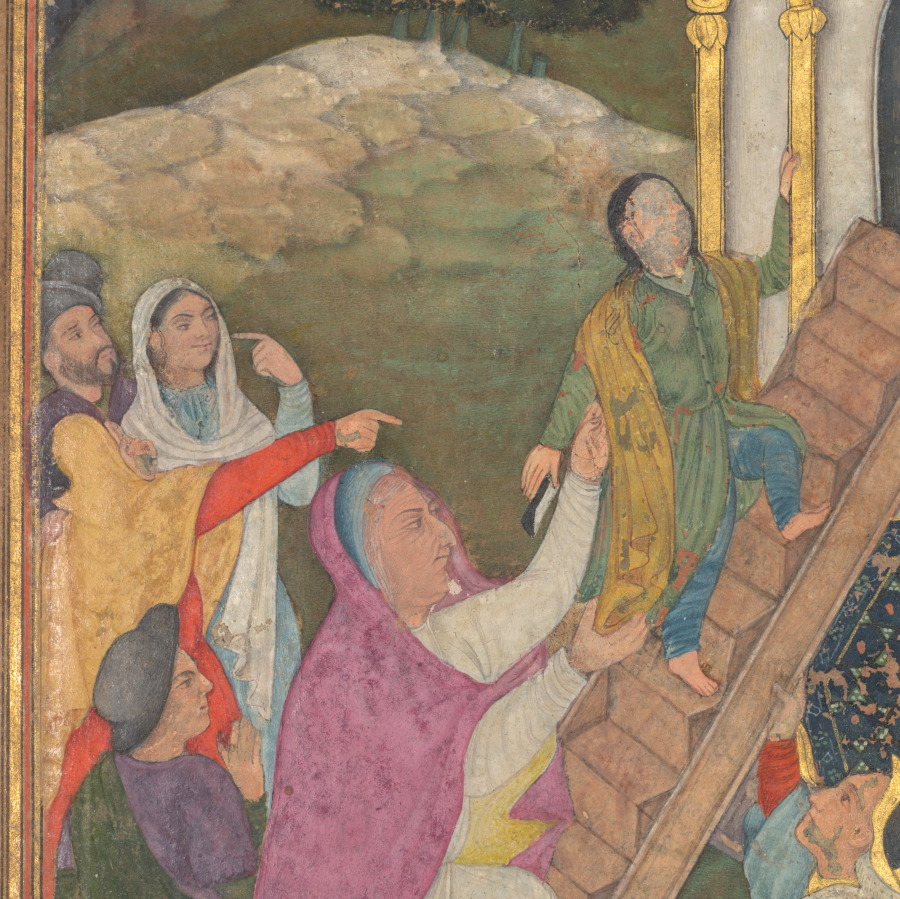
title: Mary ascends the stairs to the temple, from a Mirror of Holiness (Mir’at al-quds) of Father Jerome Xavier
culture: Mughal India, Allahabad, made for Prince Salim (1569–1627)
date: 1602–4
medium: Gum tempera, ink, color, and gold on paper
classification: Manuscript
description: Three-year-old Mary bounds up the stairs of the temple, eager to begin her education. Onlookers gesture in surprise. In the background the rocks have been cleverly shaded to look like faces—a Persian technique of visual double-entendre that the Mughals admired and adopted. This work is the second of the 27 surviving paintings made for this manuscript. The first, a scene of Mary’s birth, is in a private collection in Europe. Mary’s face had been painted with a fragile white paint, which has fallen off. Now only the underdrawing remains visible.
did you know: Mary’s instructor awaits her, book in hand, at the top of a temple of learning.